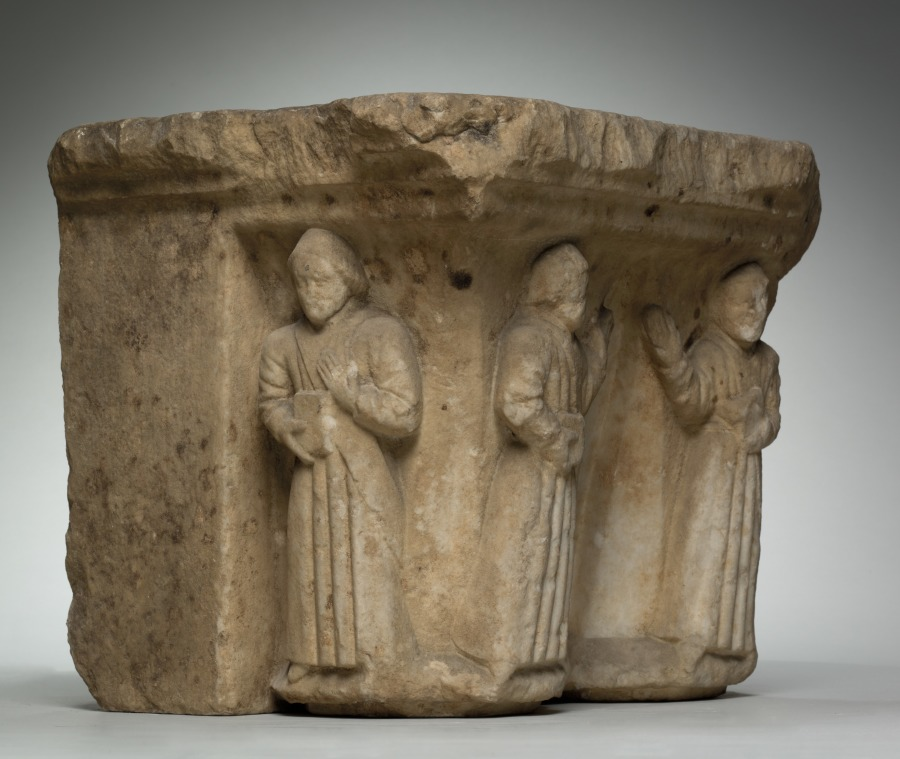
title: Engaged Capital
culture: Southern France, Abbey of Larreule, near Tarbes, 15th century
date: 1400s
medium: limestone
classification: Sculpture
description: This capital belongs to a surviving group including other architectural fragments that once decorated the cloister of the Abbey of Larreule. A cloister was a covered walkway or arcade, usually around all four sides of a square area of grass (the "cloister garth"). The seclusion of the cloister was the monks’ exclusive domain, off limits to others. Here, the monks were supposed to pray, study, meditate, and exercise in privacy and solitude. Such cloister capitals served both to instruct the monks and as a focus for their devotions. Other capitals in this series are installed in the Jardin Massey at Tarbes, near the original abbey. An arch from Larreule has been assembled with other associated French capitals at The Cloisters in New York.